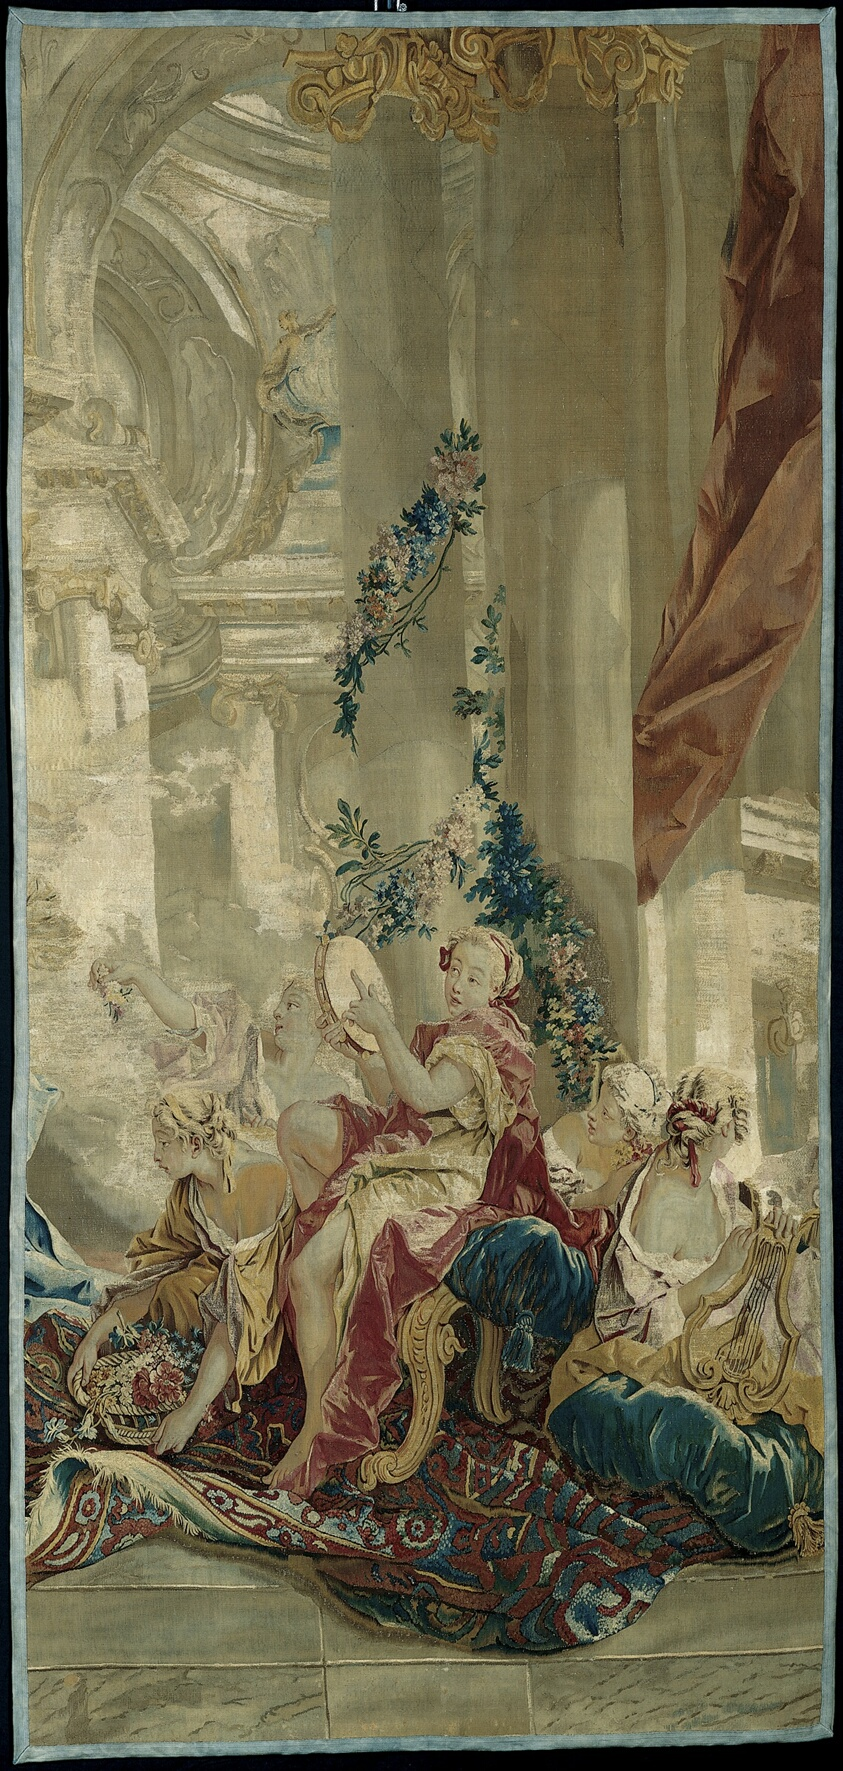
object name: Textile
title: Psyche's Entrance into Cupid's Palace from the Story of Psyche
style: Rococo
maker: After a cartoon by François Boucher (1703–1770); Woven at the Manufacture Royale de Beauvais (French, founded 1664) under the direction of André Charlemagne Charron (French, director 1754–80); France, Beauvais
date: 1756/63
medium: Wool and silk; tapestry weave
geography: Beauvais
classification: weaving - tapestry; decorative arts; textile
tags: mythology, music, musical instruments